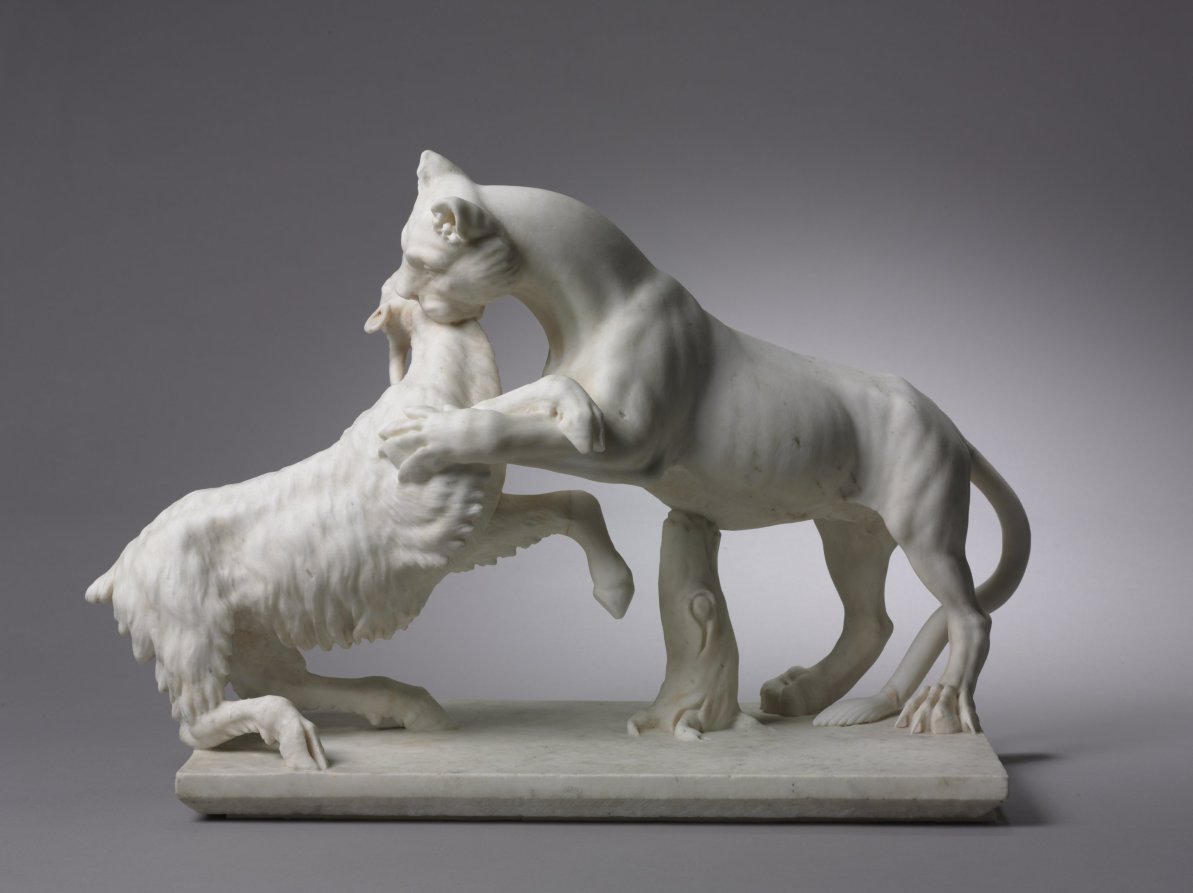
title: Panther Attacking a Goat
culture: Italy, 18th century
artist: Francesco Antonio Franzoni (Italian, 1734–1818)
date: late 1700s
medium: marble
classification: Sculpture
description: One of the best known restorers of ancient sculpture, Francesco Franzoni often invented totally new compositions from small fragments. However, this sculpture is entirely Franzoni’s own work, down to the breaks seen in such places as the panther’s tail and the goat’s legs and jaw. Curiously, Franzoni based this work on one of his own restorations, now in the Vatican, although his composition here is more balanced and elegant, in keeping with ideas in the late 1700s about how ancient sculpture should look.